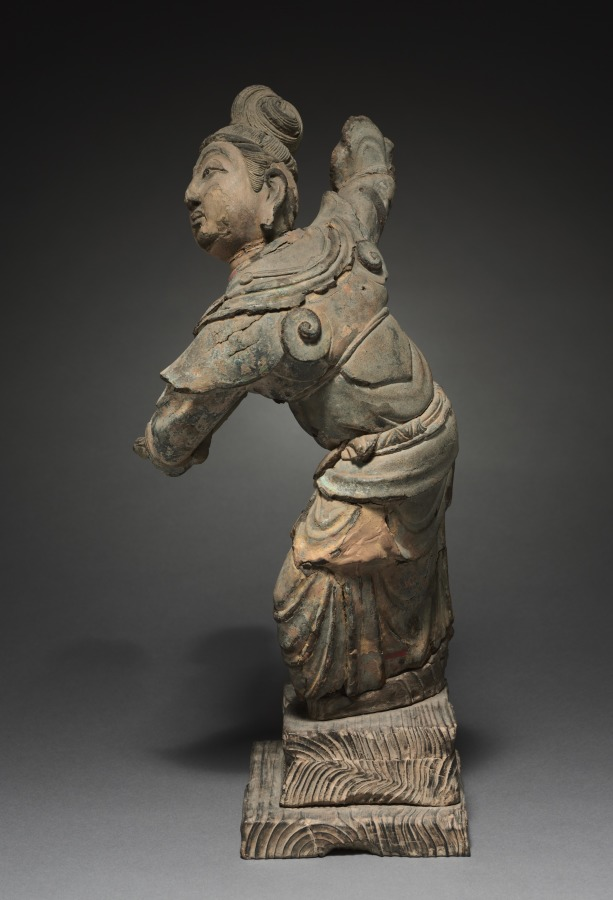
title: Dancing Apsaras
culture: China, late Tang dynasty (618–907) to Five dynasties (907–960)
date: 900s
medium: dry lacquer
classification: Sculpture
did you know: The sculpture was made from a rare technique involving alternate layers of cloth and lacquer, modeled on an armature or around a removable clay core.